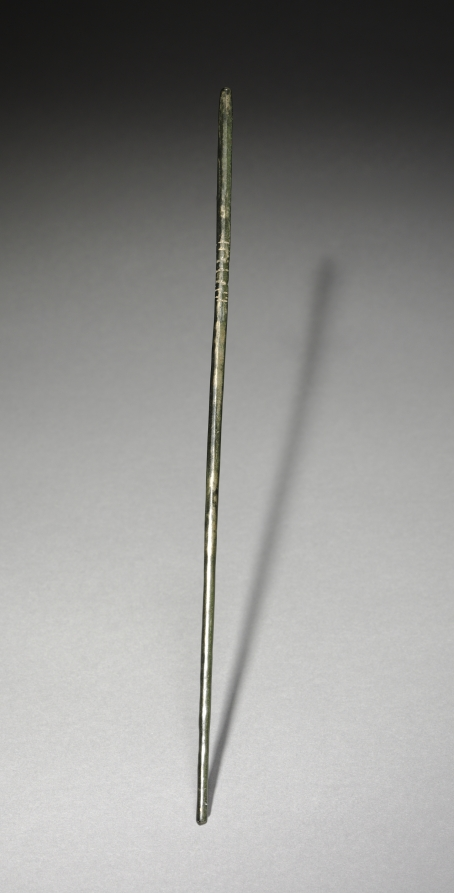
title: Chopstick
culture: Korea, Goryeo dynasty (918–1392)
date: 918–1392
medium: bronze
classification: Metalwork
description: In Korea, chopsticks made of metal such as brass, silver, and gold were excavated from ancient tombs and ruins dated to the 6th century at the earliest. Burial goods often include utilitarian objects such as table wares and utensils because the dead were believed to need them in the afterlife.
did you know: In contrast to the Chinese and Japanese, Koreans still prefer metal chopsticks (stainless steel and brass) to wooden ones.